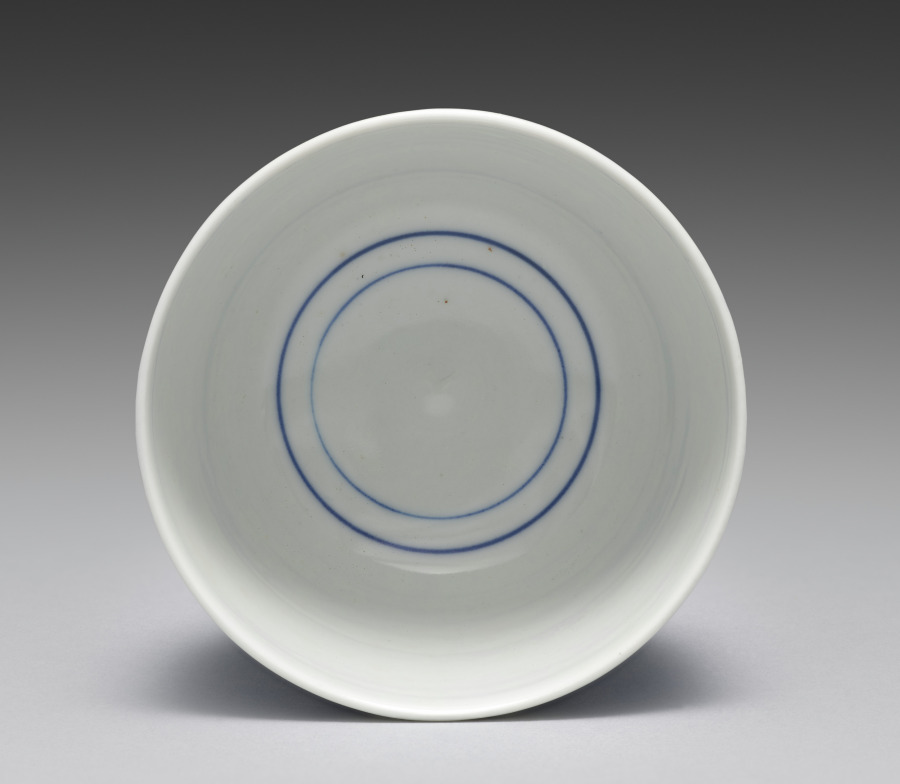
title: Teacup from Teacups with a Hundred Sages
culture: Japan, Meiji period (1868–1912)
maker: Seifū Yohei III (Japanese, 1851–1914)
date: 1893–1914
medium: One from a set of five teacups; porcelain with underglaze blue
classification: Ceramic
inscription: 清風造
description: Each of these five teacups has a painting of identical design in underglaze blue, but as the tiny figures are drawn entirely by hand, each cup has its own personality. The theme of the sencha cups is an assembly of sages or immortals, literally “a hundred venerable [people]” (hyakurō). The myriad figures crowd the scene in groups. The god of longevity, with his tall forehead, sits with his cranes, having flown in from Mt. Penglai on the Isle of the Immortals. Seven long-bearded sages sit around a stone table, chatting and drinking; one is seated on an enormous gourd. Of course, there is a stack of books on the table, and elsewhere, scrolls are being written upon or read—in one case held very close by a sage who is wearing glasses. The design was enormously popular in ceramics made for those engaged in literati culture.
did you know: Seifū Yohei III (1851–1914) produced many works for tea gatherings where people drank Chinese-style leaf-tea (sencha).